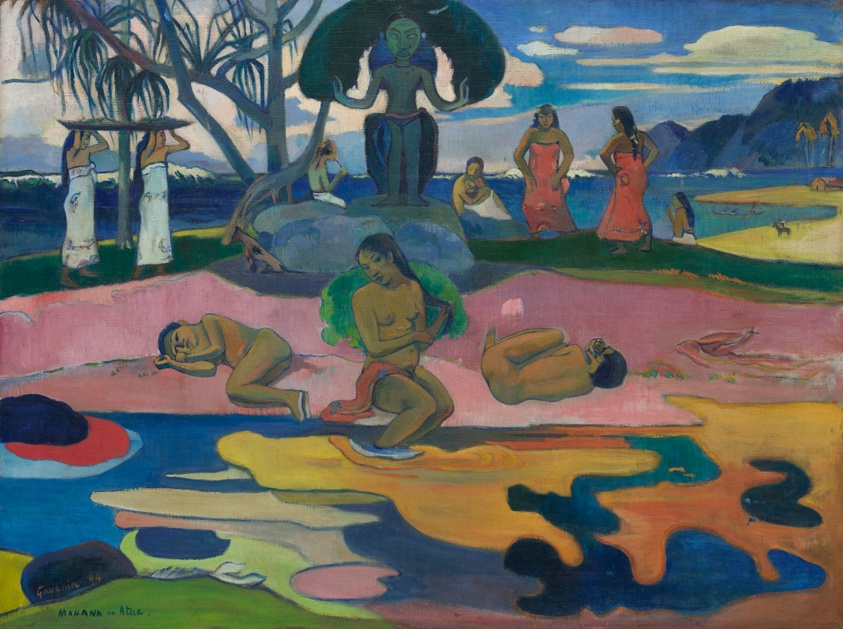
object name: Painting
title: Mahana no atua (Day of the God)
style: Post-Impressionism, 19th century, nineteenth century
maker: Paul Gauguin (French, 1848–1903)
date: 1894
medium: Oil on linen canvas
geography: France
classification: oil on canvas; france; french; oil paintings (visual works); paint; painting; european painting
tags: women, abstract, beach, celebrations, clouds, colonialism, figure, figures, France, French, nudes, shore, sky, statues, trees, weather/seasons, dancers, landscapes, mysteries/fantasies, religious scenes, water, Century of Progress, world's fairs, Chicago World's Fairs